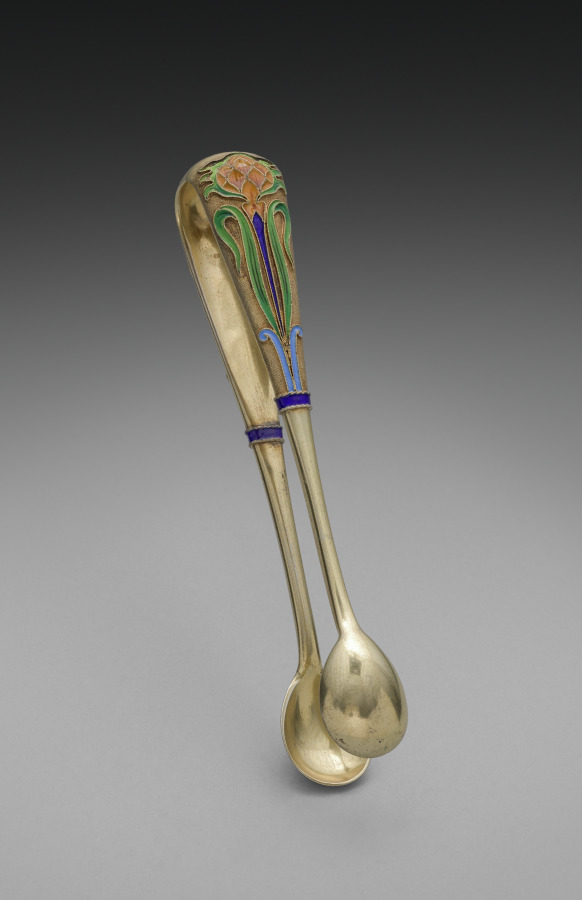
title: Sugar Tongs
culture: Russia, St. Petersburg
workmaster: attributed to Feodor Ivanovich Rückert (Russian, 1840–1917)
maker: House of Fabergé (Russian, 1842–1918)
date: 1887–96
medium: silver gilt, opaque cloisonné enamel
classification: Miscellaneous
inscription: 84, St. George? [assay mark for Moscow, 1882-1896]; C. Fabergé (in Cyrillic); double-headed eagle [imperial warrant]; 11494 scratched.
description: Fabergé’s craftsmen in Moscow, especially under the watchful eye of workmaster Feodor Rückert, became known for their work in the pan-Slavic or neo-Russian style, hearkening back to 17th-century motifs of Russian folk art. Often on rather conventional shapes, Rückert and his silversmiths created an explosion of color, achieved through the historic technique of cloisonné enamel in which tiny metal lines are soldered to the surface then filled with glass powders in various colors and fired to create a high gloss finish. The result is a spectacular evocation of the 17th-century originals. Far from mere copies, however, Rückert's designs, such as this tea service, employ naturalistic or abstract motifs in a thoroughly modern adaptation of a remarkable earlier period of Russian art and decoration.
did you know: These sugar tongs are part of a larger tea service.